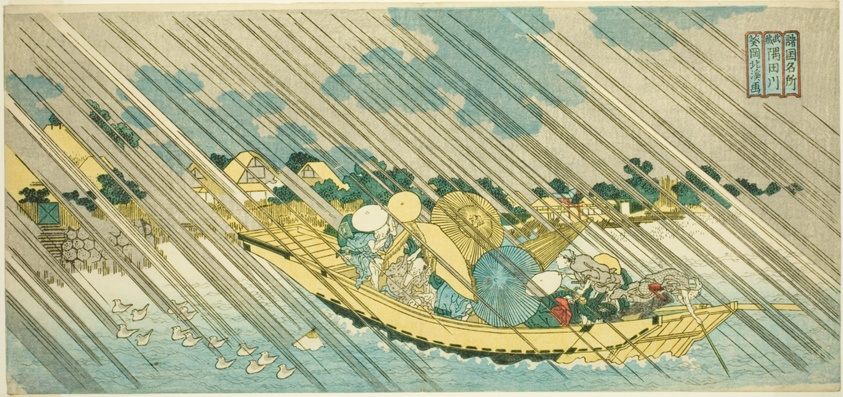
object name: Print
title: The Sumida River in Musashi Province (Musashi Sumidagawa), from the series "Famous Places in the Provinces (Shokoku meisho)"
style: Japanese (culture or style)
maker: Totoya Hokkei (Japanese, 1780–1850)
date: c. 1834/35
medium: Color woodblock print; horizontal otanzaku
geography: Japan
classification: woodblock print; print; asian art